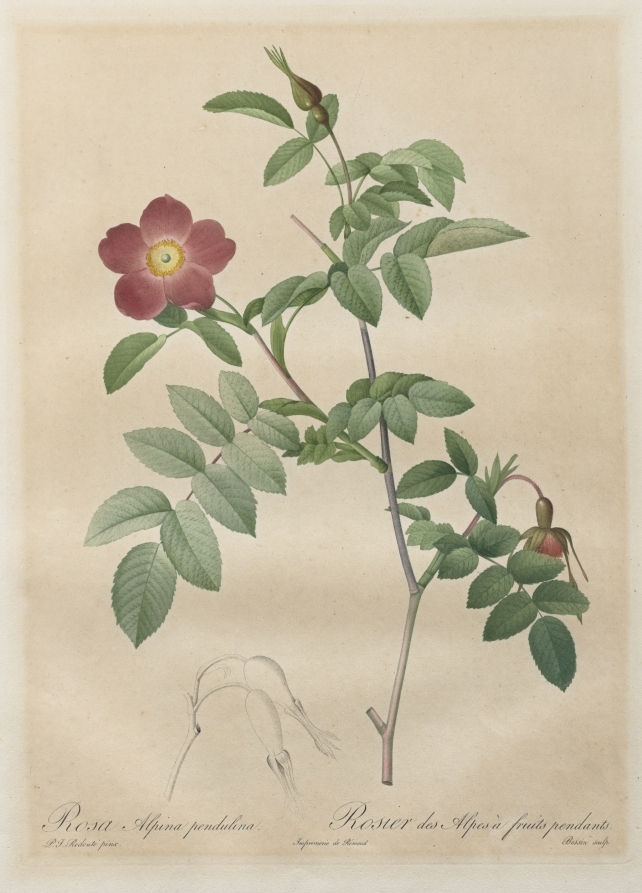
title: Les Roses: Rosa alpina pendulina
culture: France, 19th century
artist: Henri Joseph Redouté (French, 1766–1853)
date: 1817–1824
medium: stipple and line engraving, with hand coloring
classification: Print